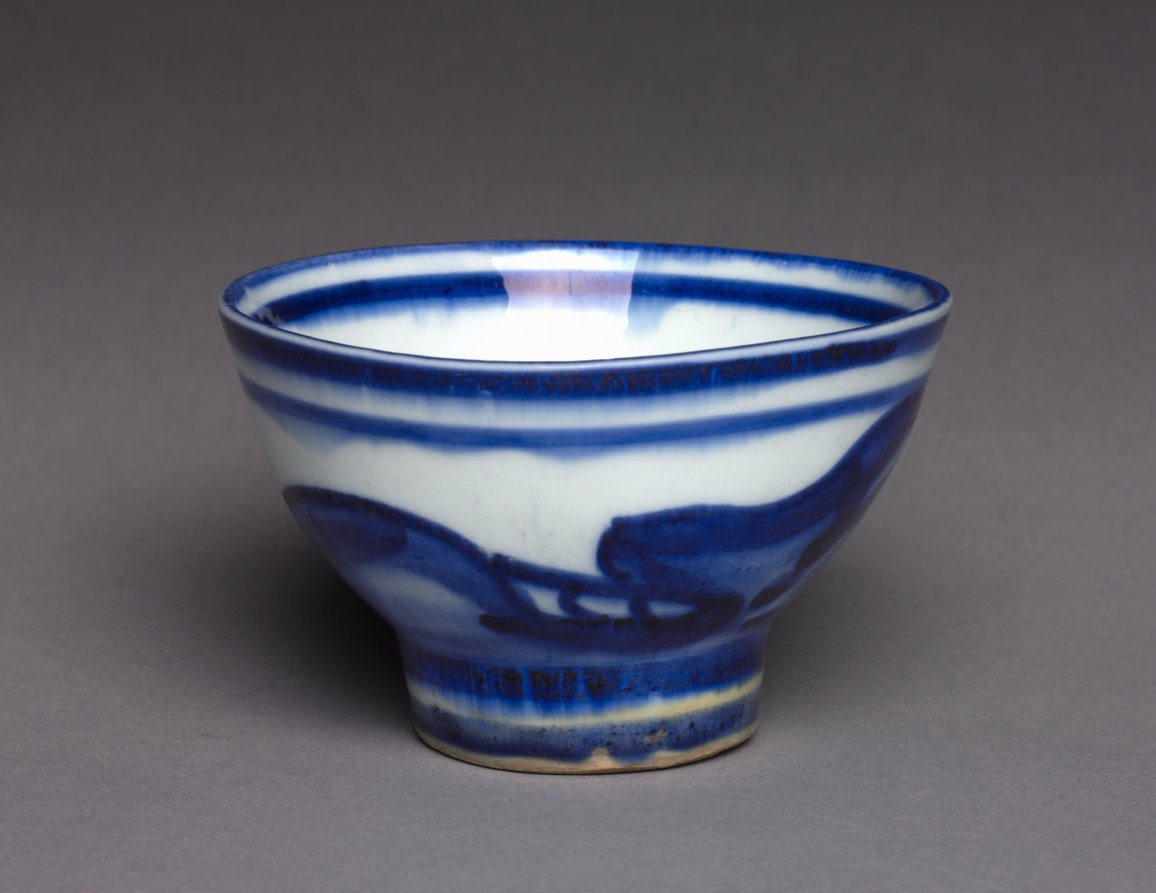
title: Tea Bowl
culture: France, Chantilly, late 18th-early 19th century(?)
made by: Chantilly Porcelain Factory (French)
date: 1800s ?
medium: porcelain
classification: Ceramic